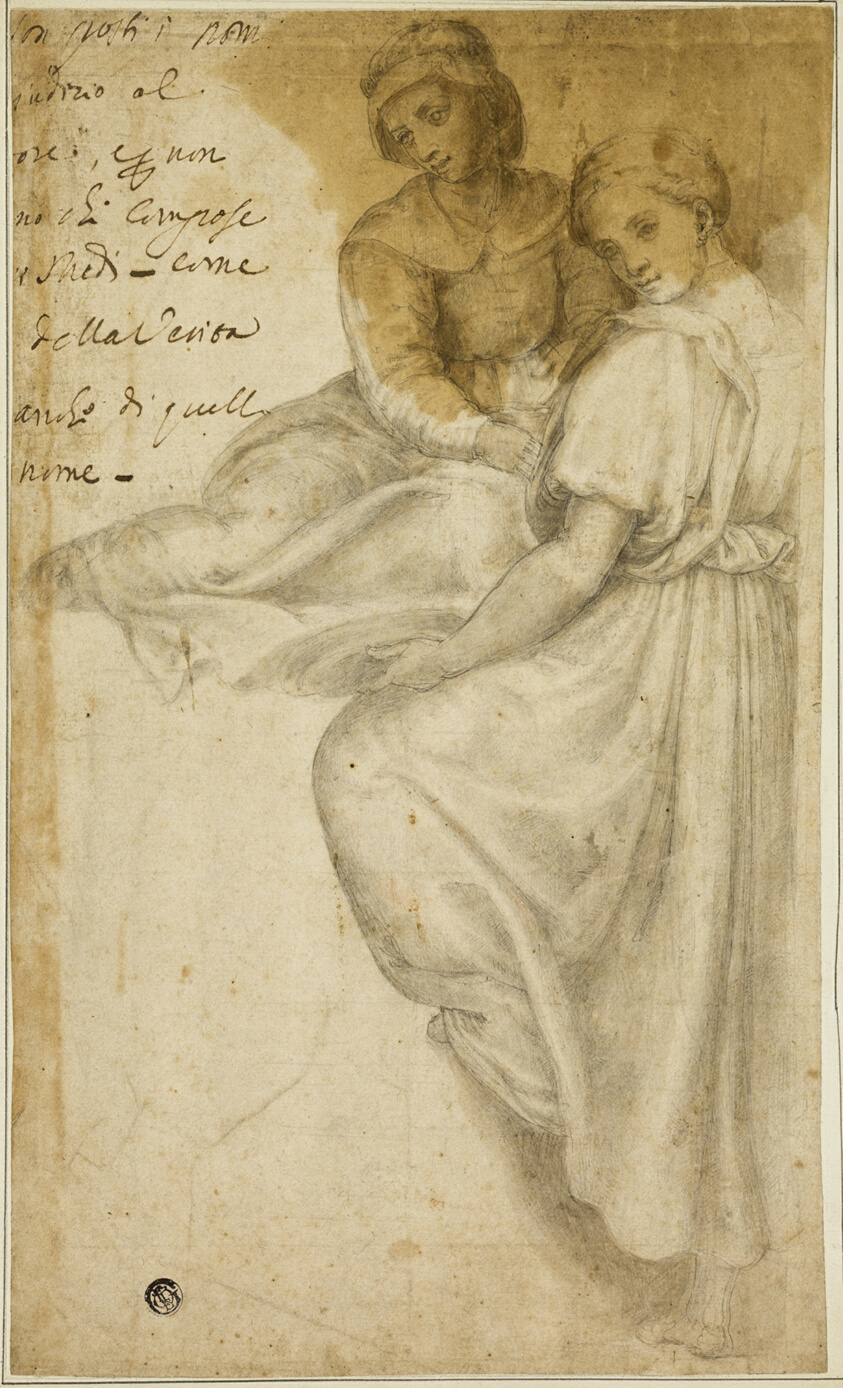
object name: Drawing and Watercolor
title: Saint Anne and Standing Woman with Salver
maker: After Andrea del Sarto; Italian, 1486-1530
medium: Black chalk with brush and brown wash, on ivory laid paper, squared in black chalk, laid down on ivory laid card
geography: Italy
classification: chalk with wash; drawings (visual works); prints and drawing